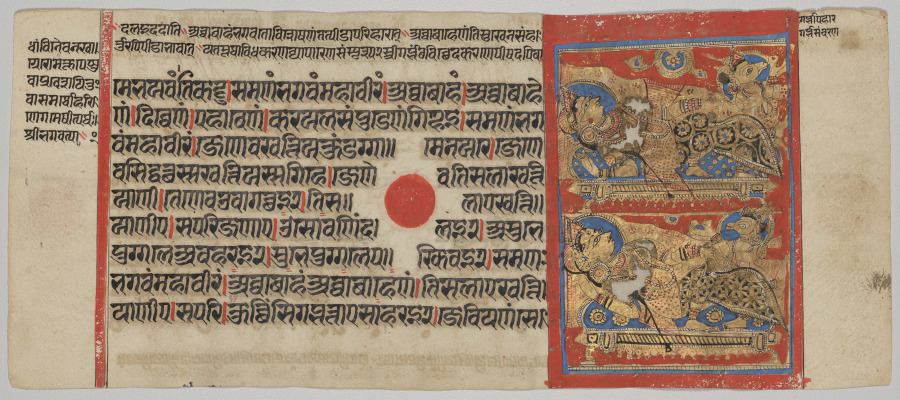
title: Transfer of the Embryo of Mahavira, Folio 12 (recto), from a Kalpa-sutra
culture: Western India, Gujarat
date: c. 1475–1500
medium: Gum tempera, ink, and gold on paper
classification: Painting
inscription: [[upper right]] garbhāpahāra/garbhasaṃvaraṇa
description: The tiny captions written in Sanskrit to the right of the painting identify the subject of this scene: “abduction of the embryo” and “transfer of the embryo.” The embryo is the unborn founder of the Jain religion. In this miraculous episode, a goat-headed divinity who presides over miscarriage and childbirth gently takes the embryo in his cupped hands away from the reclining Brahmin lady in the scene above. Below, he carries it to a queen, who will be the birth mother.